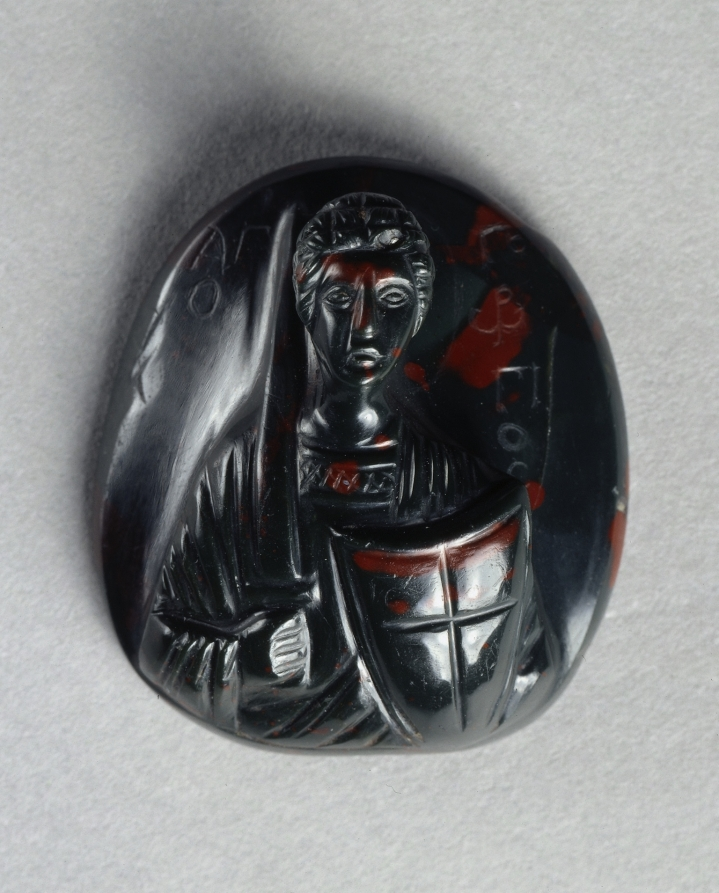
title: Bloodstone Cameo with Saint George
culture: Byzantium, Contantinople, Byzantine period, 11th century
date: 1000–1100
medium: bloodstone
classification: Glyptic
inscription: Greek inscription on either side of the head.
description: Bearing the image of Saint George, one of the Byzantine Empire’s most popular saints, this cameo served as a powerful devotional and protective device. Close physical contact with a holy image was believed to enhance its effectiveness, creating a strong bond between the worshipper and the devotional object. Originally worn around the neck, this cameo was easily kissed and touched in moments of distress or crisis. Bloodstone was also believed to carry magical medicinal powers to stop hemorrhages and increase blood circulation.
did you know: Legends about bravery can be comforting in times of distress. The wearer of this cameo, for example, may have thought about the fearlessness of Saint George in his battle against the dragon.